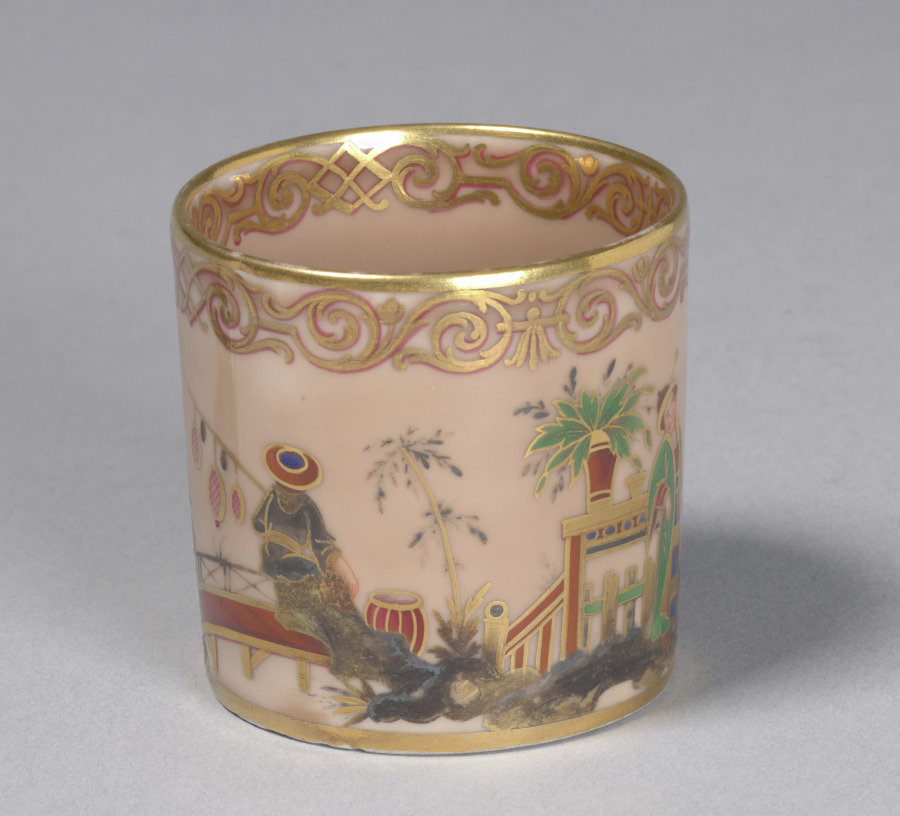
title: Cup (Gobelet litron)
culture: France, Sèvres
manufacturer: Sèvres Porcelain Factory (French, est. 1756)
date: 1778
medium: hard-paste porcelain with overglaze enamel decoration and gilt and silver decoration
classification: Ceramic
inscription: Interlaced Ls surmounted by a crown with date letters 'AA' enclosed; 'L.' below for Louis-François l'Ecot (in red)